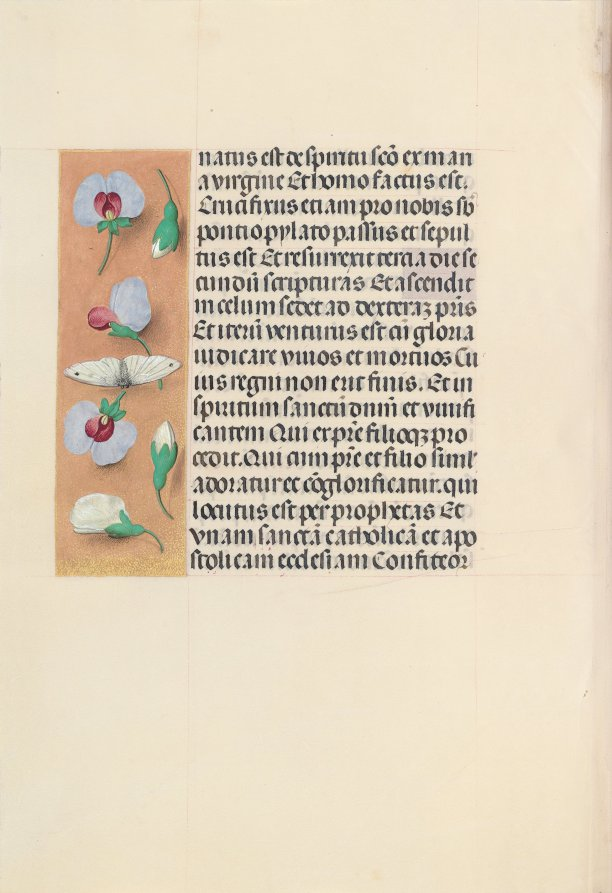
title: Hours of Queen Isabella the Catholic, Queen of Spain: Fol. 91v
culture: Flanders, Ghent and Bruges, late 15th century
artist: Master of the First Prayerbook of Maximillian (Flemish, c. 1444–1519)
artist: and Associates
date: c. 1500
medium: ink, tempera, and gold on vellum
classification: Bound Volume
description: This manuscript was illuminated by a circle of at least five highly organized manuscript painters active in the Flemish cities of Ghent and Bruges. The principal illuminator was Alexander Bening, who painted the majority of the book's miniatures. Manuscripts produced by this circle of artists are renowned for the decoration of their borders, which typically feature a rich variety of realistically-painted flowers, birds, and butterflies. This prayer book, called a book of hours, was intended not for a cleric, but for the private devotions of a lay person-in this case, Isabella the Catholic, Queen of Spain (1451-1504). Isabella's coat of arms embellishes the book's frontispiece. It is unlikely that the book was commissioned by the Queen herself; rather, she probably received it as a diplomatic gift from someone courting her patronage, perhaps Cardinal Francisco Jimenez de Cisneros. A Franciscan friar, Jimenez was dependent upon Isabella for his advancement, first to the post of Queen's confessor in 1492, and then to Archbishop of Toledo in 1495.